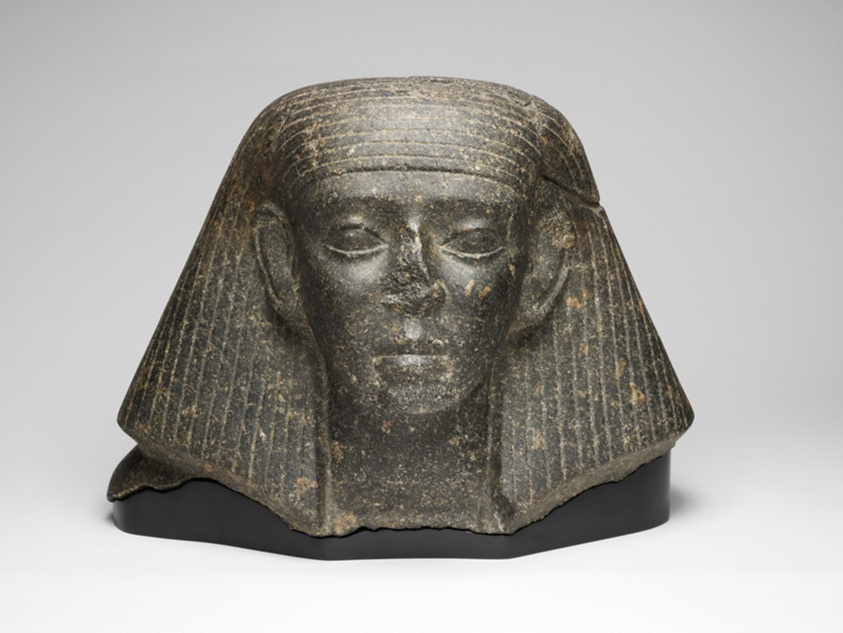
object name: Sculpture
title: Head of an Official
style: middle kingdom, thirteenth dynasty, ancient, egyptian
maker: Egyptian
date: Middle Kingdom, Dynasty 13 (about 1773–1650 BCE)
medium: Granite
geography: Egypt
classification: statue; stone; sculpture; ancient art; fragment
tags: portraits, faces, Male, statues